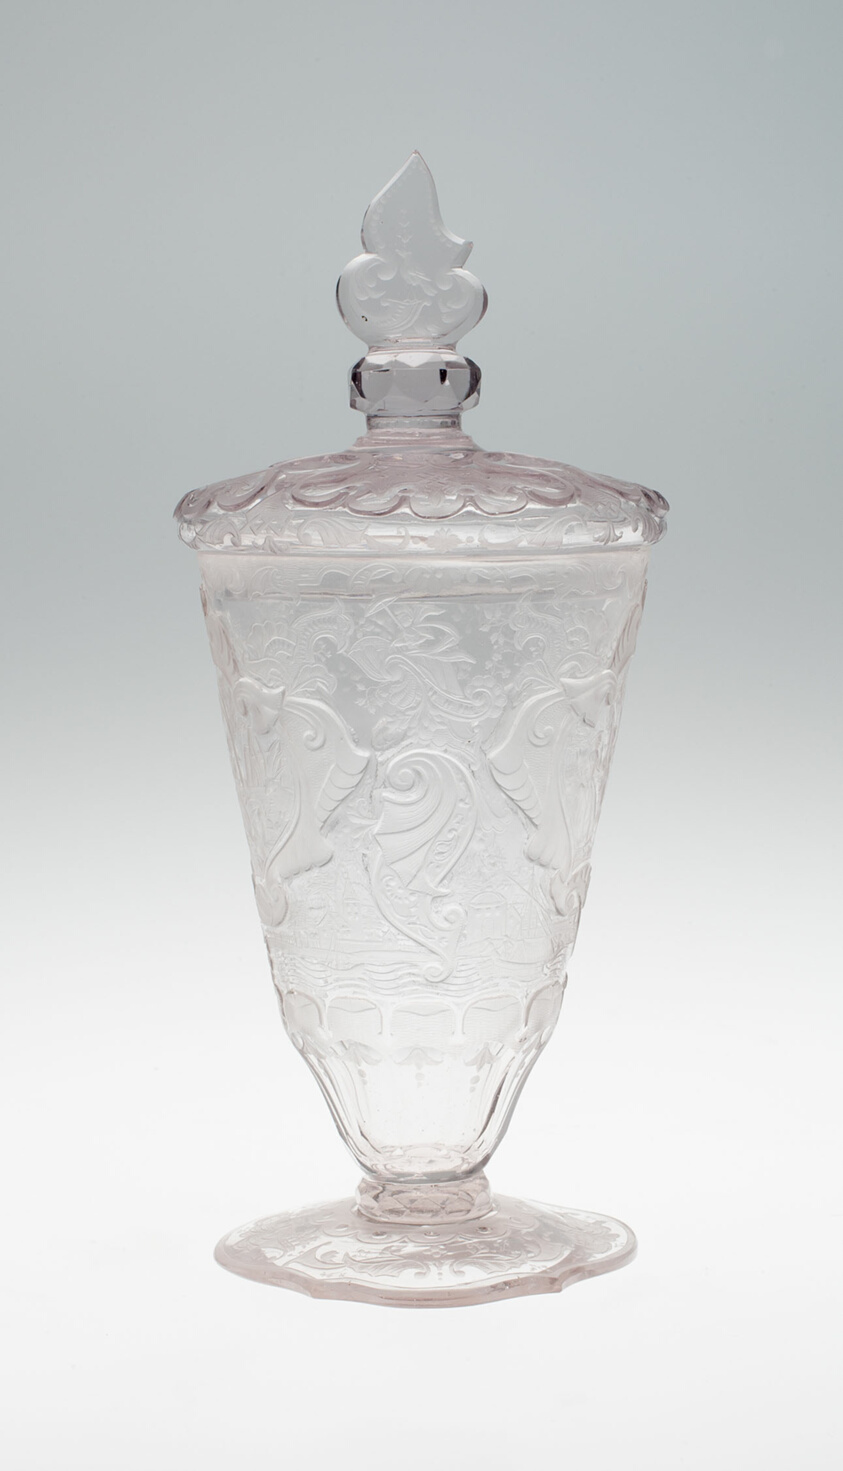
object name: Glass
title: Covered Cup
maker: Poland (formerly German Silesia)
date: c. 1760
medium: Glass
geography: Poland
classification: drinking vessel; glass; european decorative arts